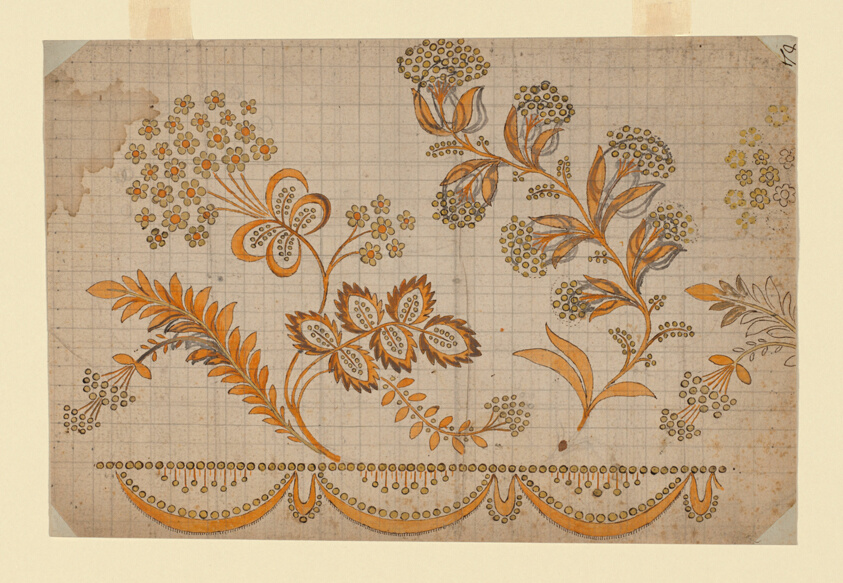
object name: Textile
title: Design for a Woven Dress Border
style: 19th century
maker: France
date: Early 19th century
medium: Opaque watercolor and pen and brown ink and graphite on cream laid paper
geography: France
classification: design; accessory - paper design; textile; garment design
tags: floral, foliage, grids, swags